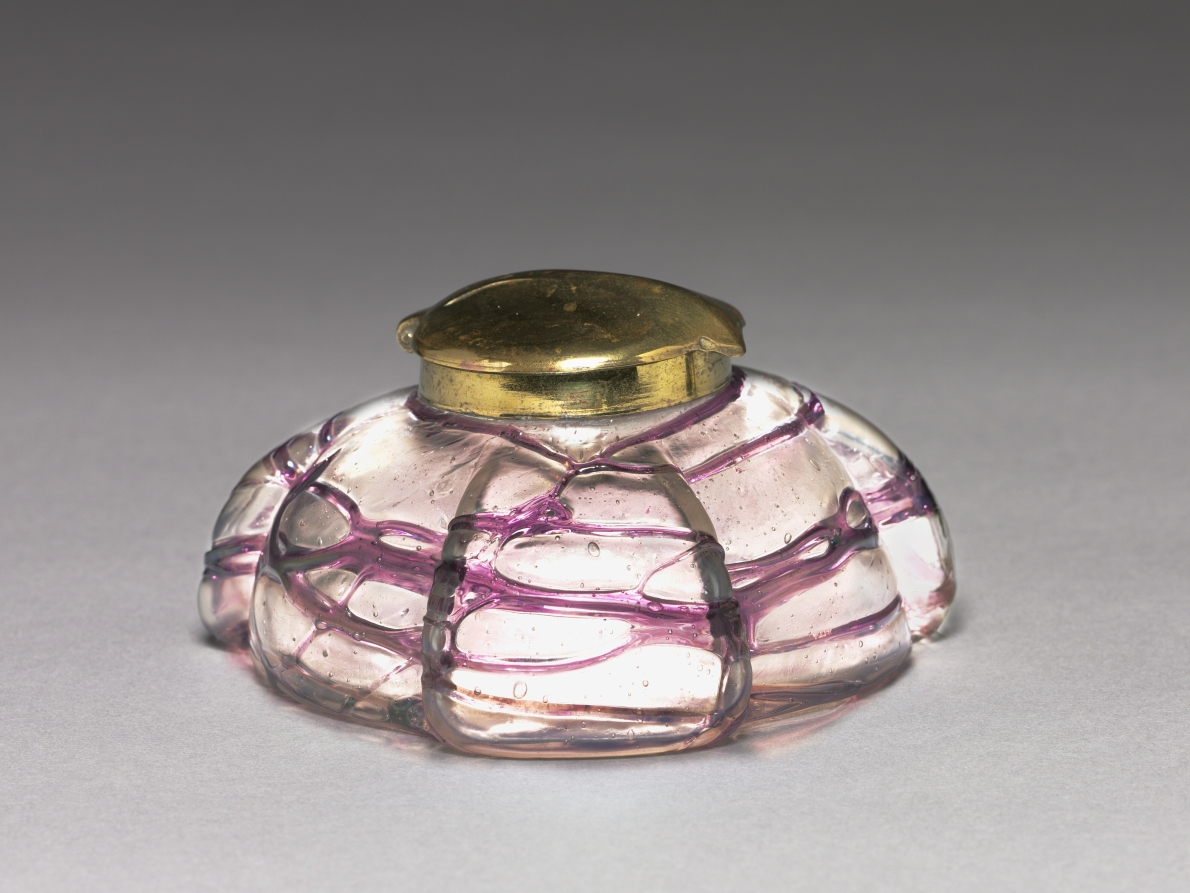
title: Inkwell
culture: Czechoslovakia, late 19th century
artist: Pallme-König & Habel (Czech)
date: c. 1899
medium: glass with bronze mount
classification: Glass